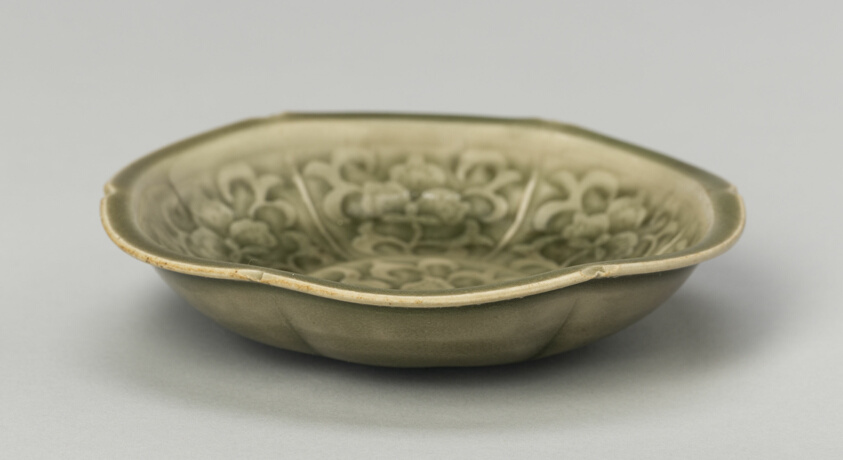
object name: Vessel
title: Dish with Petal-Lobed Rim, Stylized Peony, and Sickle-Leaf Scrolls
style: Chinese (culture or style)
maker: China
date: Northern Song dynasty (960–1127), 11th/12th century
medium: Yaozhou ware; stoneware with underglaze molded decoration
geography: China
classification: dish (vessel); ceramics; vessel